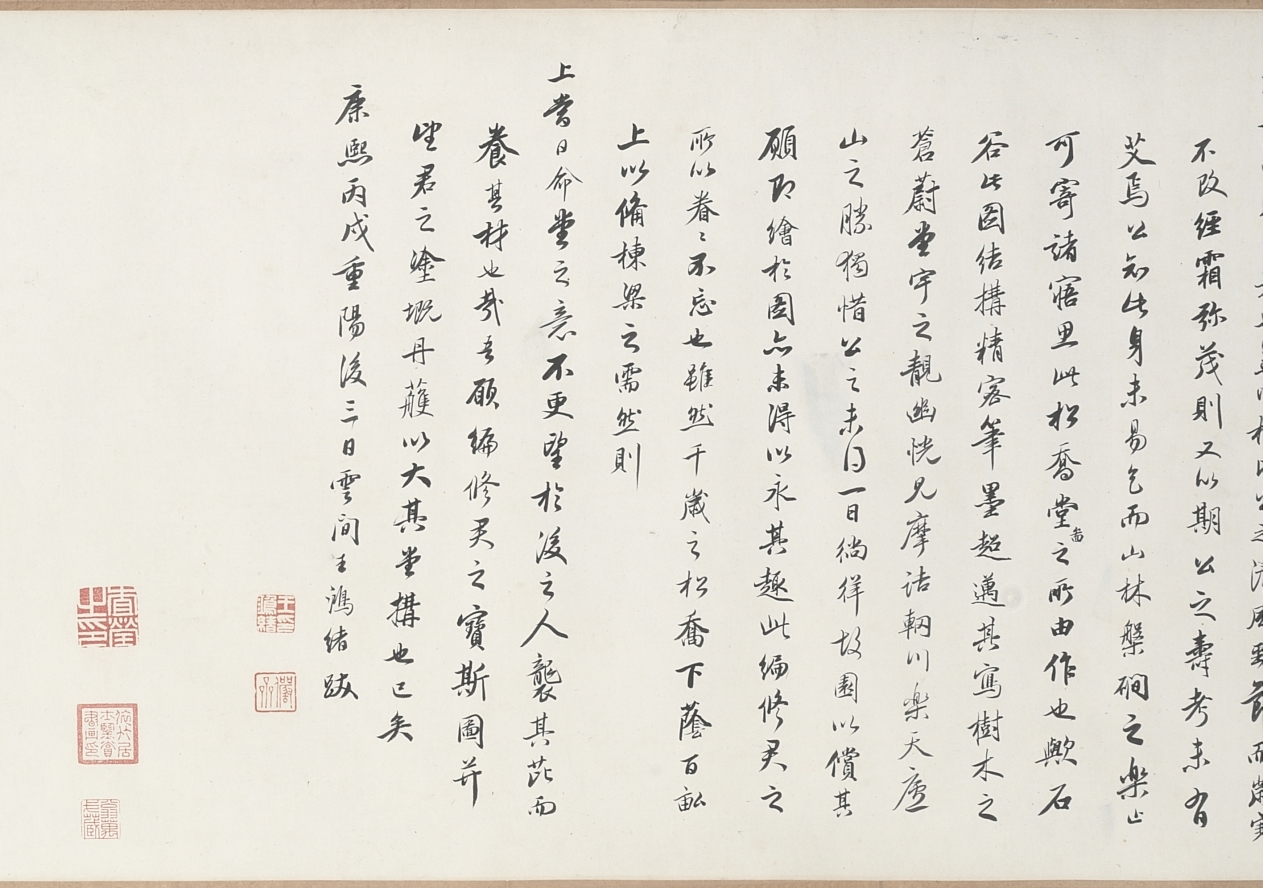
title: Hall of Lofty Pines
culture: China, Qing dynasty (1644-1911)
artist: Wang Hui (Chinese, 1632–1717)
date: 1703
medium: handscroll; ink and color on paper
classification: Painting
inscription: [題] 松喬堂圖 康熙癸未夏六月, 海虞耕煙散人王翬畫。[印]王翬之印; 石谷. [左下] 來青閣; 耕煙野老時年七十有二.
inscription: 松喬堂圖一卷，海虞石谷王君為靜海近公厲少司冦公作也。圖成于癸未之夏。未幾而公遂仙去。公令子今編修君南湖屬余題跋其後。余與公同官侍從，交契最深。側見公之清修純德，蔚為聖天子所眷重。侍直內廷，密勿贊襄，幾二十餘年。蒼生之所以受賜，士林之所以沐德者，天下莫能窺，在廷莫能悉。而公卒不言。以故宸衷日益契，恩禮亦日益渥。雖年逾懸車，時有歸老之念。而上固不聼公之去。其所謂松喬堂者，御書以賜公者也。蓋以松比公之清風勁節，而歲寒不改，經霜彌茂。則又以期公之壽考未有艾焉。公知此身未易乞，而山林槃磵之樂，止可寄諸寤思。此松喬堂圖之所由作也歟。石谷此圖，結構精密，筆墨超邁。其寫樹木之蒼蔚，堂宇之靚幽。恍見摩詰輞川樂天廬山之勝。獨惜公未得一日徜徉故園以償其願。即繪於圖亦未得以永其趣，此編修君之所以眷眷不忘也。雖然千歳之松喬，下蔭百畝，上以修棟梁之需。然則上當日名堂之意，不更望於後之人襲其芘而養其材也哉。吾願編修君之寶斯圖。并望君之塗塈丹雘，大其堂構也已矣。 康熈丙戍重陽三日，雲間王鴻緒跋。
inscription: 10 additional seals: 1 seal of Li Duna 勵杜納 (1628–1703); 4 seals of Zha Ying 查瑩 (jinshi of 1766); 5 seals of Li Yun (dates unknown).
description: Wang Hui 王翬, a leading painter in the orthodox school of the early Qing dynasty (1644–1911), was commissioned to paint this landscape with a country estate for Li Duna 勵杜納 (1628–1703), vice minister of justice in Emperor Kangxi’s court. The emperor had honored Li by granting him a piece of calligraphy with the name of Li’s retirement retreat, “Hall of Lofty Pines.” He drew a comparison between pines and Li’s upright character, resilience, and longevity. Wang Hui’s painting was supposed to allow Li to imagine living in a beautiful, secluded compound among the hills and pines. Sadly, Li died before seeing the completed painting and before receiving the emperor’s permission to retire. The landscape begins with peaceful riverbanks and low hills. The pines around the estate in the middle of the handscroll are truly lofty, some stretching even beyond the frame of the painting. Li Duna, the estate’s owner, is shown twice in his serene mountain retreat: first approaching the entrance to the compound with two servants at the right, and then later in the scroll, to the left, reading in the comfort of an inner room.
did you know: One servant carries the estate owner's carefully wrapped qin, a type of zither.